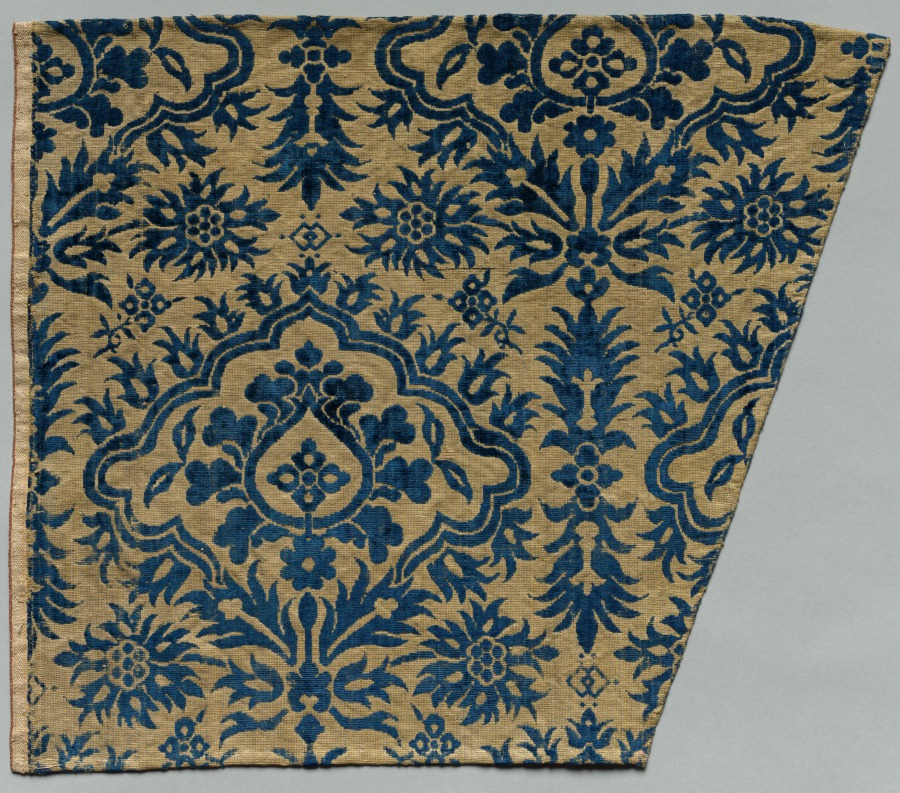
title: Velvet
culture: China, 17th century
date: 1600s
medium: velvet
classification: Velvet